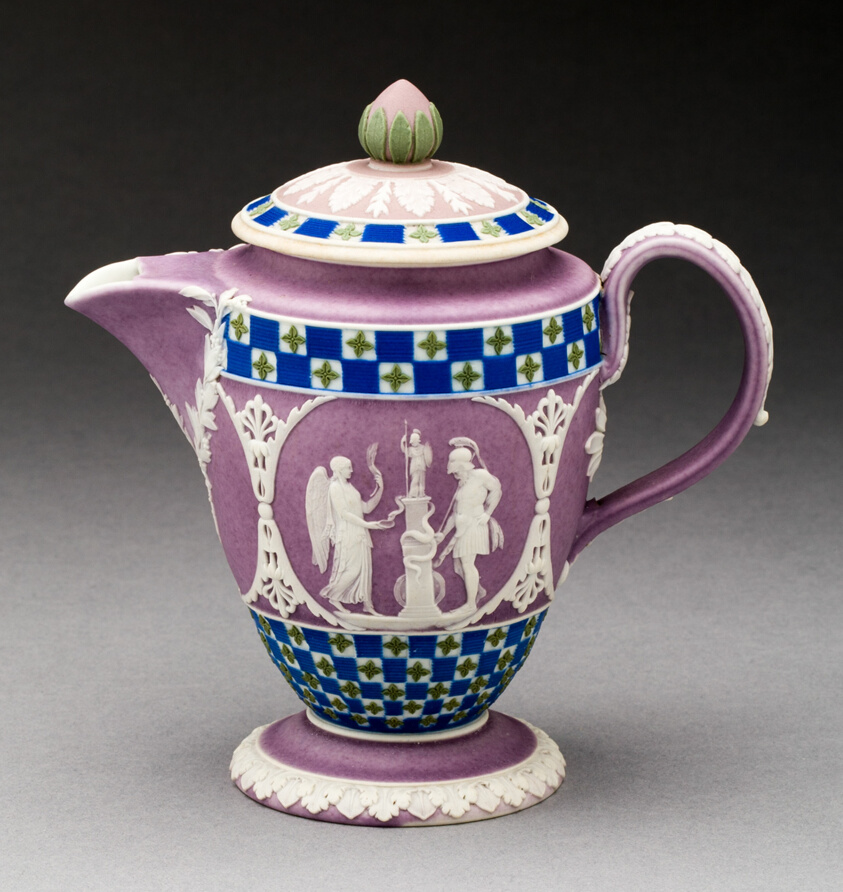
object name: Ceramics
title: Hot Water Pitcher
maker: Wedgwood Manufactory (England, founded 1759)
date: c. 1800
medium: Stoneware (jasperware)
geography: Burslem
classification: pitcher (vessel); vessel; tableware; ceramics; stoneware; european decorative arts